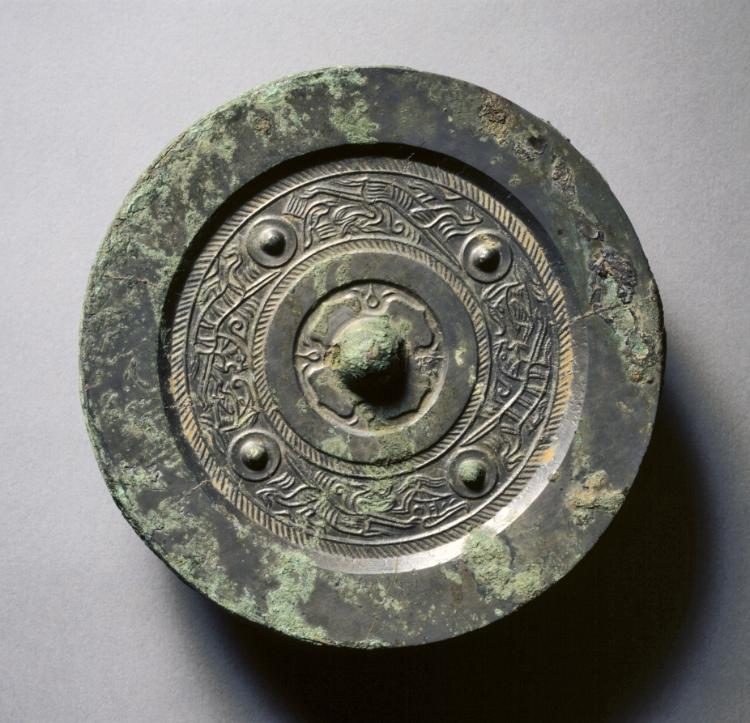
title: Mirror with Four Nipples, Dragons, and Tigers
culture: China, Western Han dynasty (206 BCE–8 CE)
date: 100–1 BCE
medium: bronze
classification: Metalwork